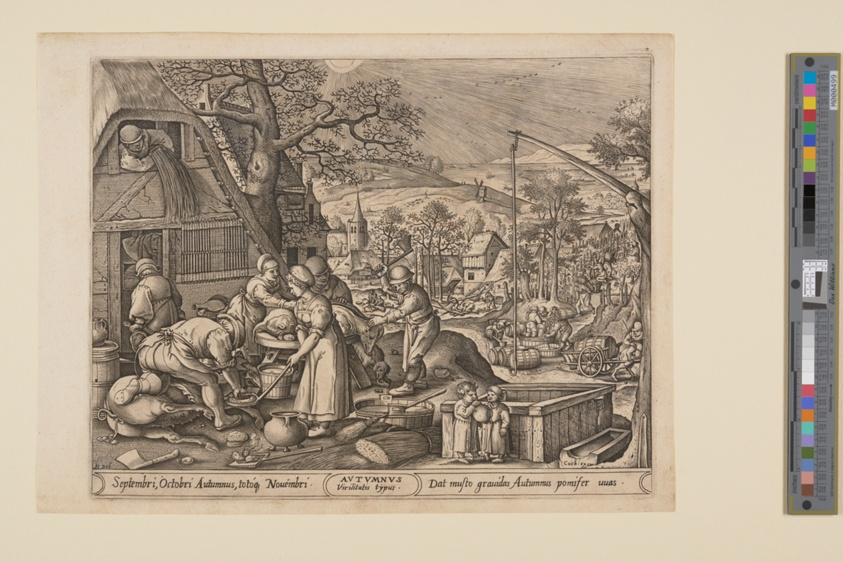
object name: Print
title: Autumn, from The Four Seasons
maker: Pieter van der Heyden (Flemish, c. 1530–after 1572); Hans Bol (Flemish, 1534–1593)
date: 1570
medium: Engraving on ivory laid paper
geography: Flanders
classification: print; paper; prints and drawing; engraving